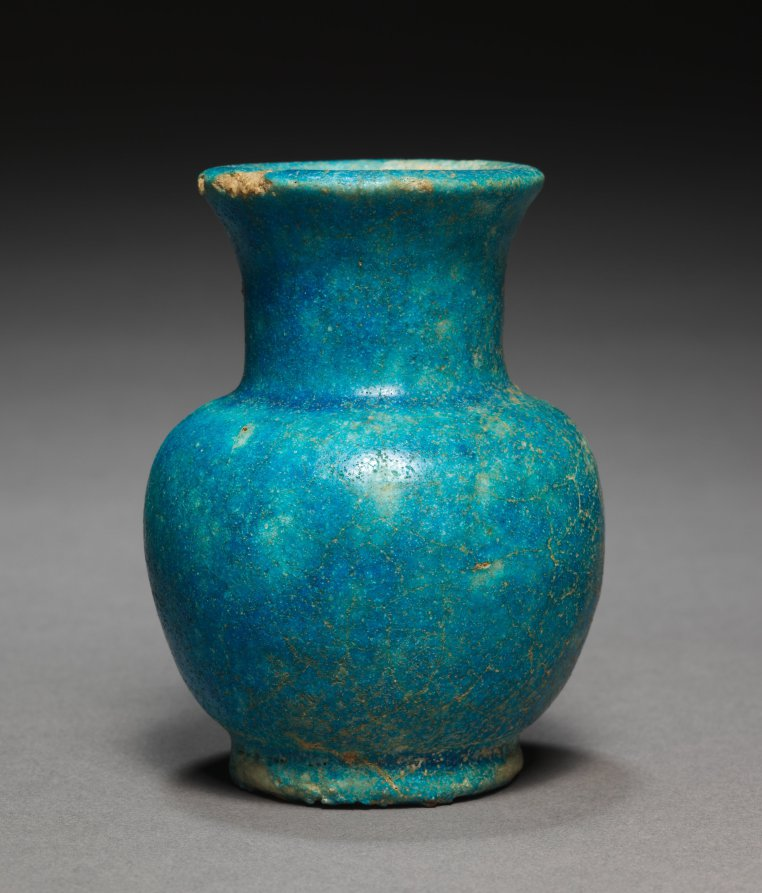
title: Jar with Tall Neck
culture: Egypt, Greco-Roman period (332 BCE–395 CE), Roman empire (30 BCE–395 CE)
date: 30 BCE–395 CE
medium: blue faience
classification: Vessels